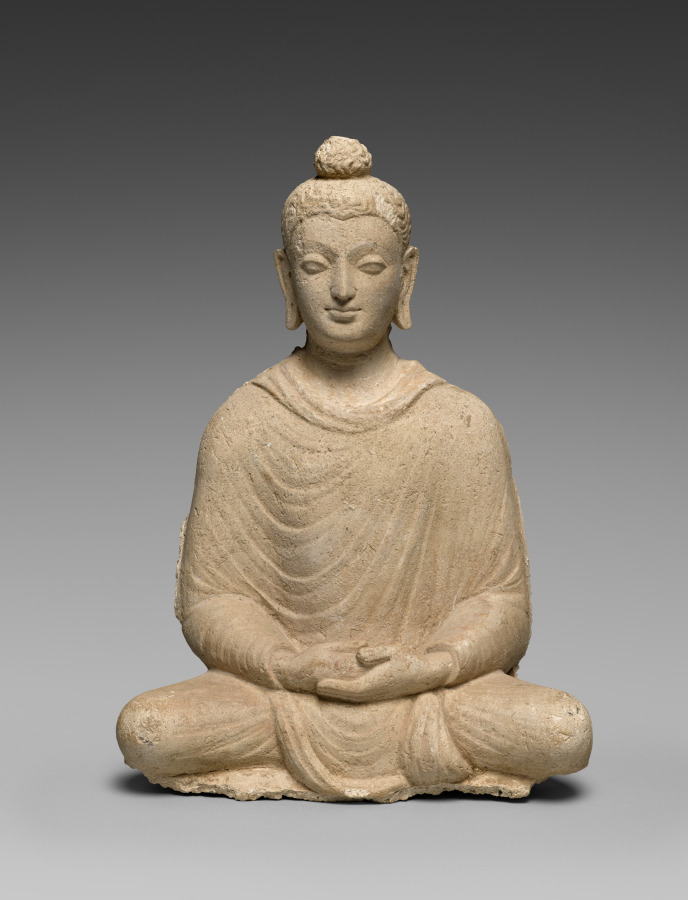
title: Seated Buddha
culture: Afghanistan, Hadda, probably Tape Shotor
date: c. 300 CE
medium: stucco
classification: Sculpture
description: Multiple images of seated Buddhas and related figures surrounded monuments called stupas that enshrined sacred relics. Made of stucco, which is a lime-based plaster material, the backs of the sculptures were fixed to the platform on which the hemispherical stupa was constructed. Visitors would see these images as they venerated the stupas by walking around them reverently, in a clockwise direction. The main stupa at Hadda reportedly contained relics of Shakyamuni Buddha, also known as Siddhartha Gautama, the founder of the Buddhism.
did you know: The way the Buddha holds his hands on his crossed legs indicates that he is shown in meditation.